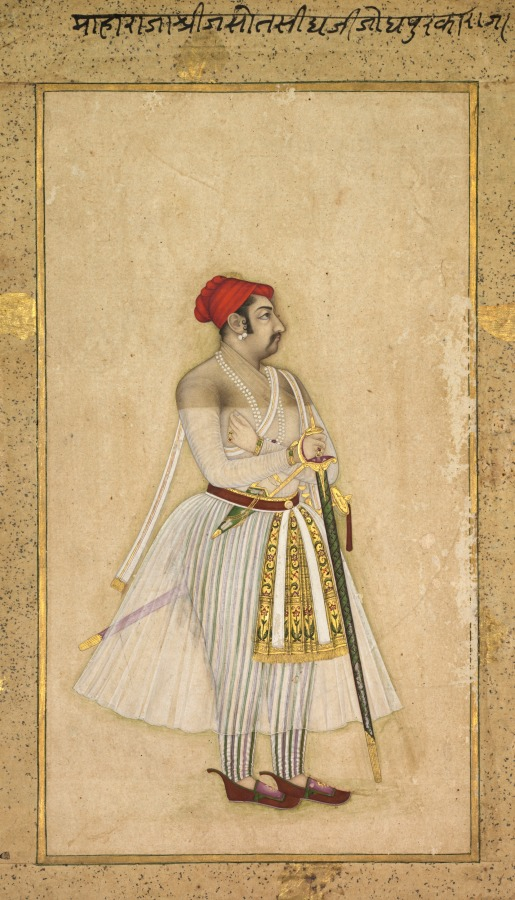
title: Jaswant Singh of Jodhpur (reigned 1635–1678)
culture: Northwestern India, Rajasthan, Rajput kingdom of Jodhpur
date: c. 1660–65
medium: Gum temper and gold on paper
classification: Painting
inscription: verso, upper center: Maharaja Shri Jasot Singh-ji Jodhpur-ka Raja.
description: Mughal emperors forged alliances with the Hindu rulers of territories under their control by offering them positions of military authority within the Mughal court. Jaswant Singh, the raja (ruler) of Jodhpur, served as a military officer under the emperors Shah Jahan (reigned 1627–58) and Alamgir (also known as Aurangzeb; reigned 1658–1707). The flowering plants at the end of his sash became popular during the reign of Shah Jahan. His military accouterments include two swords and a stabbing dagger. The sensitive shading and mode of dress are closely based on Mughal styles, indicating Jodhpur’s close allegiance to the Mughal empire.